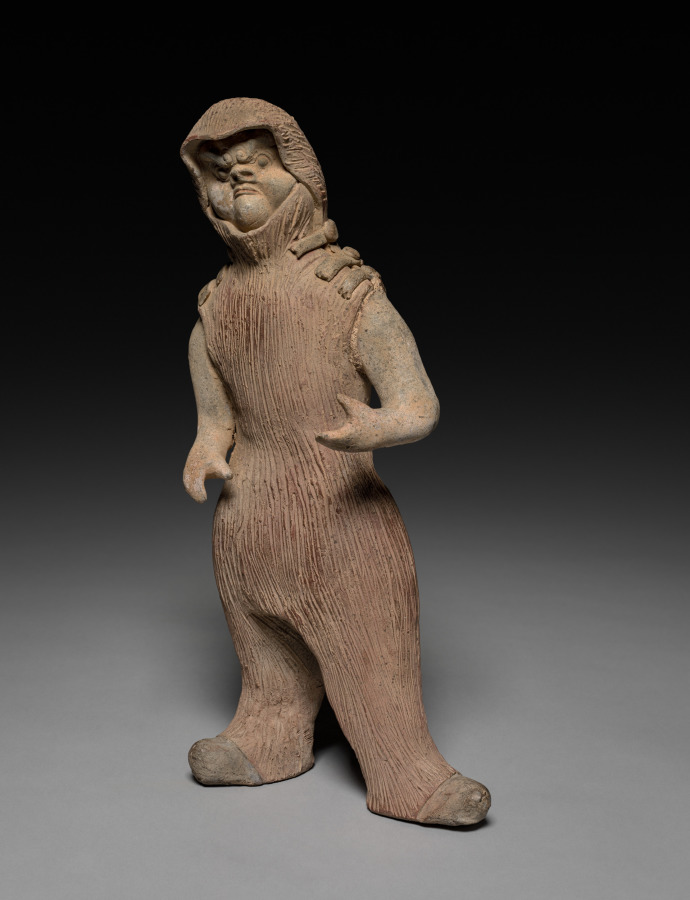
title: Figure of a Warrior in Leather Armor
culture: China, Modern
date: 20th Century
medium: buff earthenware with traces of polychromy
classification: Sculpture